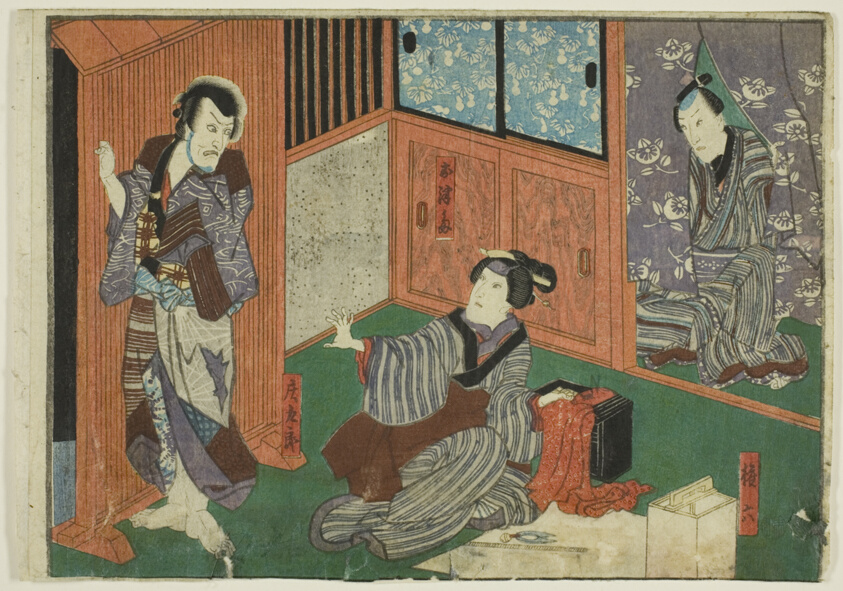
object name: Print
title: Actors as Genroku, Otsuma, and Shokuro, from an untitled series of half-block images of kabuki scenes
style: Japanese (culture or style)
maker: Utagawa Kunisada I (Toyokuni III) (Japanese, 1786-1864)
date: c. 1851/52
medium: Color woodblock print; chuban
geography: Japan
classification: woodblock print; print; asian art